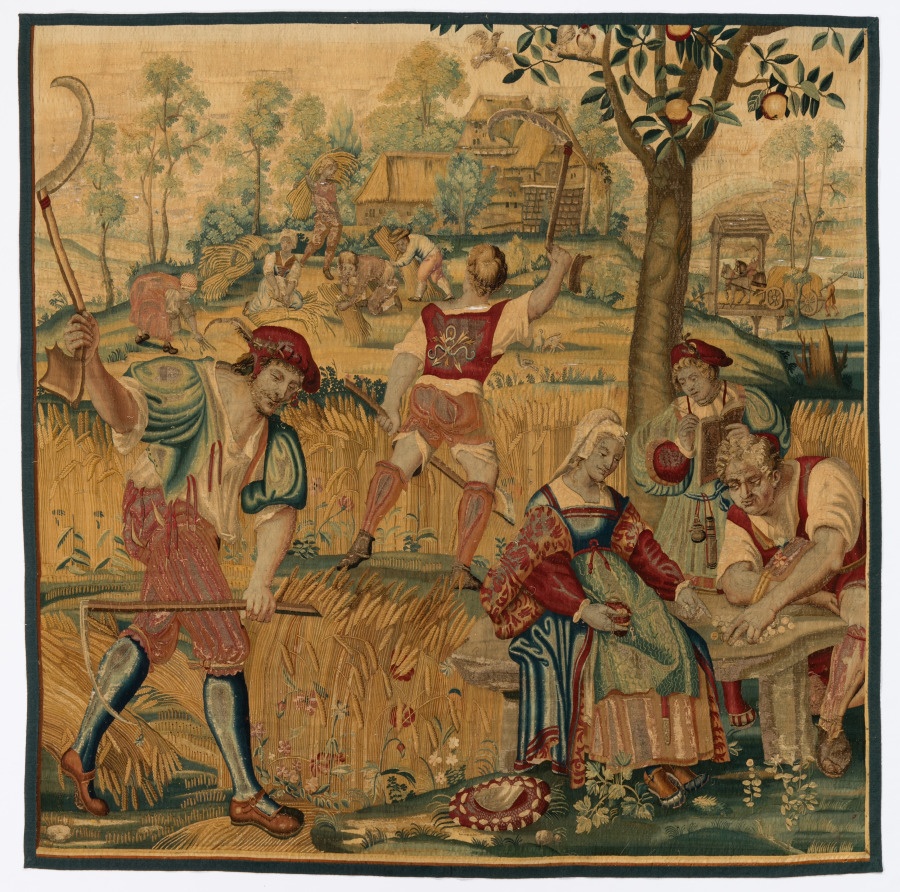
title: Summer: Harvest Scene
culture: France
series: Four Seasons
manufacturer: possibly by Gobelins Manufactory (France, Paris, est. 1662)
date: designed c. 1535, woven mid- to late 1600s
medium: Wool, silk, and gold filé: tapestry weave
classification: Tapestry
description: The wheat harvest took place in July and represented the hard, hot work of summer. The reaper in the foreground and his companion in the middle distance swing their scythes high above their heads as they prepare to cut the wheat stalks. Underneath the shade of an apple tree, three figures in the foreground are determining a price for the wheat. A woman gestures to the coins that the seated man is counting. Behind them another man holds an account book, in which he records their decisions. His pen holder and ink pot hang from his belt. In the distance to the right, two horses draw a cart piled high with wheat toward four farmers who gather bunches of wheat stalks together and tie them into bundles.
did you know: Images of the harvest provided a way to express pride in the fruitfulness and plenty of a particular region and celebrate the diligence of the field laborers.